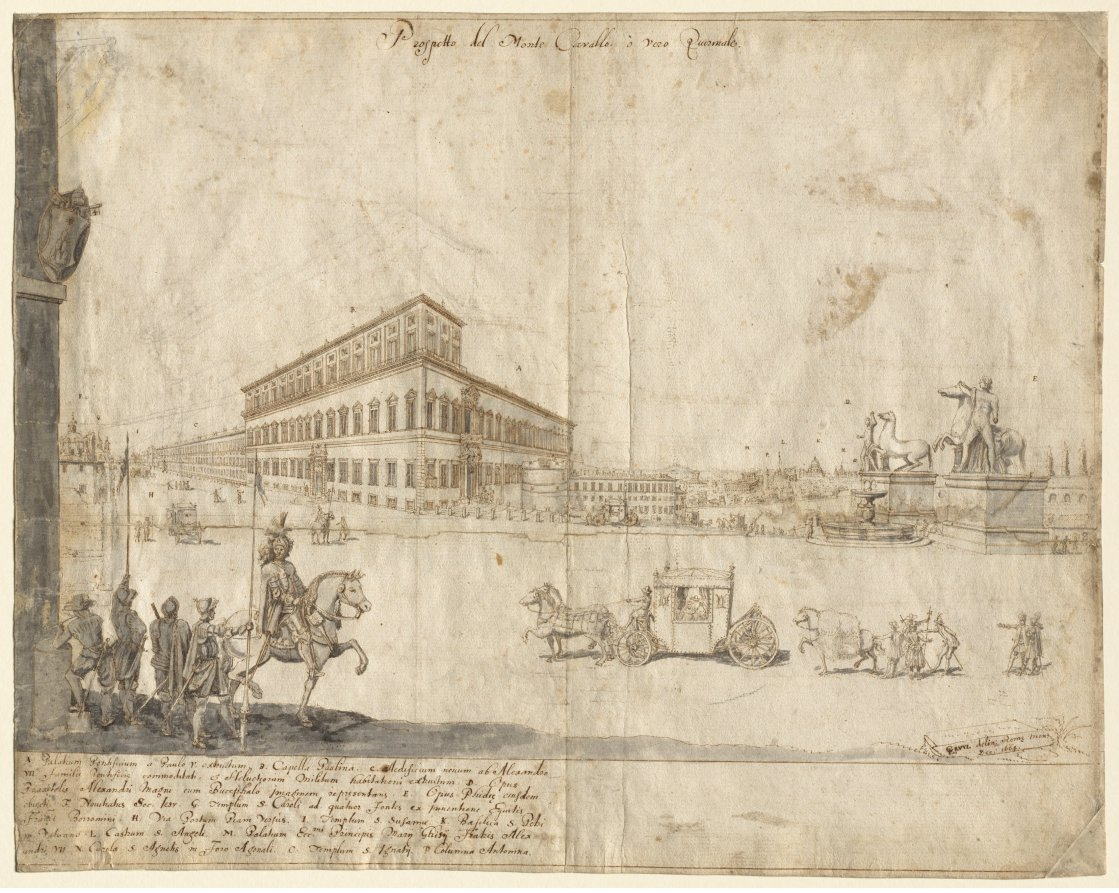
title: Eighteen Views of Rome: The Quirinale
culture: Flanders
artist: Lievin Cruyl (Flemish, c. 1640-c. 1720)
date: 1664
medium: pen and brown ink and brush and gray wash over graphite; framing lines in brown ink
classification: Drawing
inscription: signed, lower right, in brown ink: [artist monogram: LC] RVYL delin: Romæ men: / Dec: 1664 ; by artist, upper center, in brown ink: Prospetto del Monte Cavallo, ò vero Quirinale. ; by artist, throughout composition, in brown ink: [the letters A-P] ; by artist, lower left, in brown ink: A. Palatium Pontificum a Paulo V. extructum. B. Capella Paulina. C. Aedificum novum ab Alexandro / VII. familiæ Pontificiæ commoditati, et Helvetiorum Militum habitationi extructum. D. Opus / Praxitelis Alexandri Magni cum Bucephalo jmaginem repraesentans. E. Opus Phidiae eiusdem / obiecti. F. Novitiatus Soc. Iesu. G. Templum S. Caroli ad quatuor Fontes ex jnventione Equites / Franci Borromini. H. Via Portum Piam Versus. I. Templum S. Susannæ. K. Basilica S, Petri / in Vaticano. L. Castrum S. Angeli. M. Palatium Ecc.mi [mi superscript] Principis Marij Ghisij Fratris Alex= / andri VII. N. Cupola S. Agnetis in Foro Agonali. O. Templum S, Ignatij. P. Columna Antonina. ; VERSO, upper left, in ink?: [illegible, masked] ; ON STRIPS OF PAPER MOUNTED TO VERSO, lower right, in graphite: A 20972 [sideways] ; lower right, in graphite: [E. ?] #6